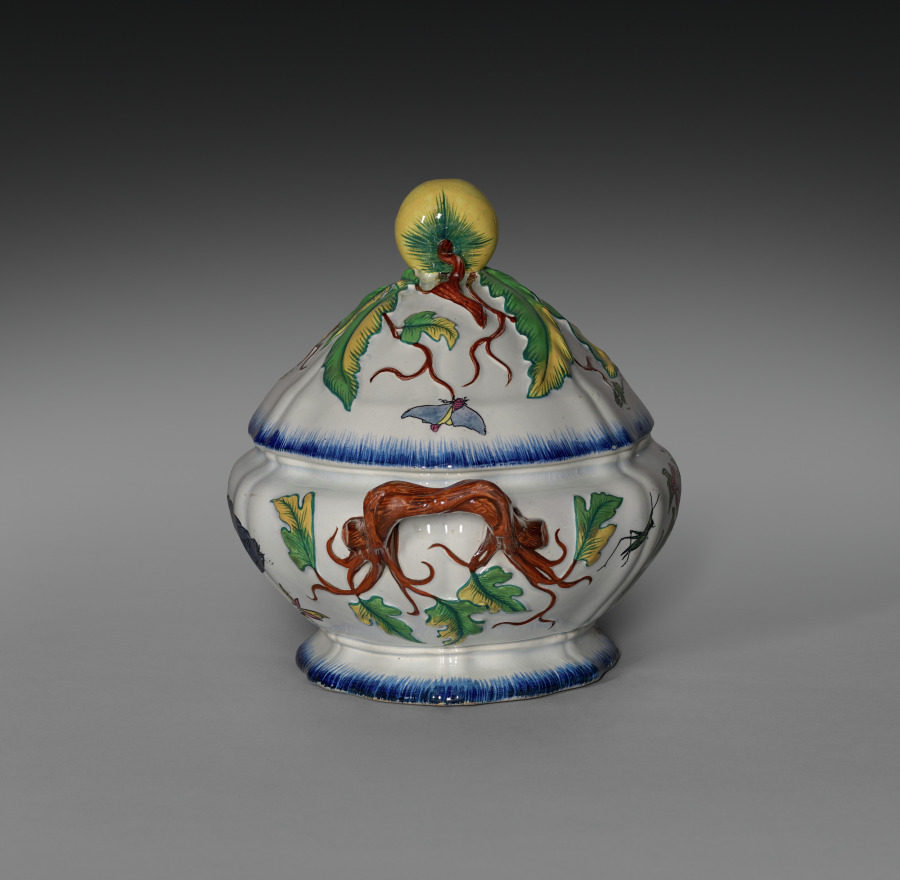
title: Covered Tureen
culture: France, Creil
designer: Félix Bracquemond (French, 1833–1914)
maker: Creil Factory (French)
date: 1866–75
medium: porcelain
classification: Ceramic